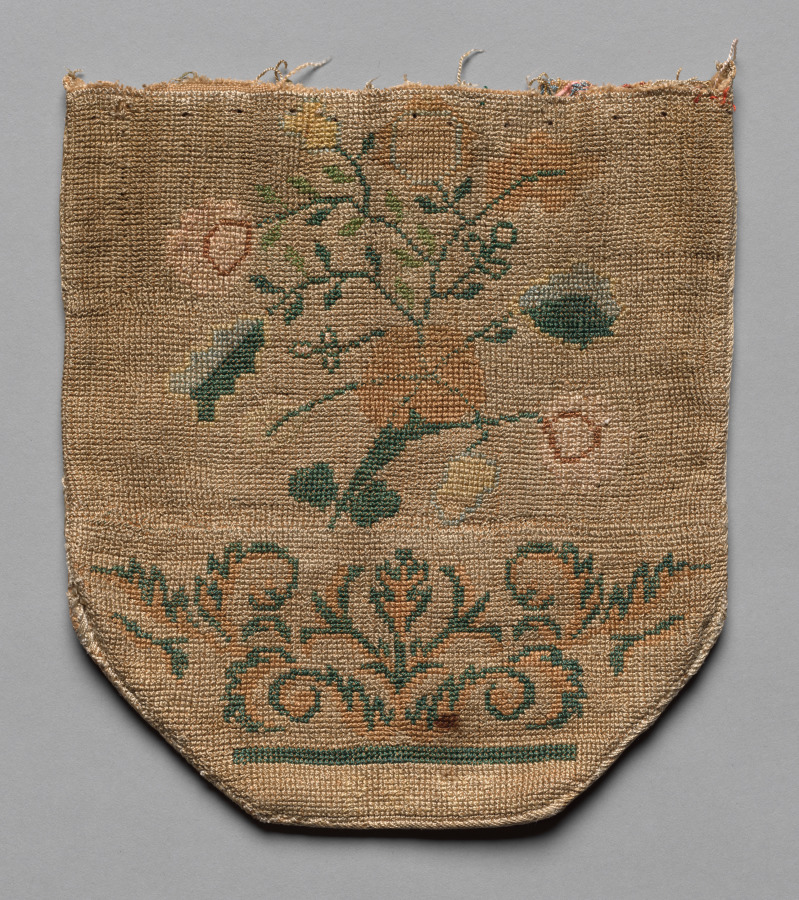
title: Embroidered Bag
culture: America, first half 19th Century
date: 1833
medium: embroidery, silk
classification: Embroidery